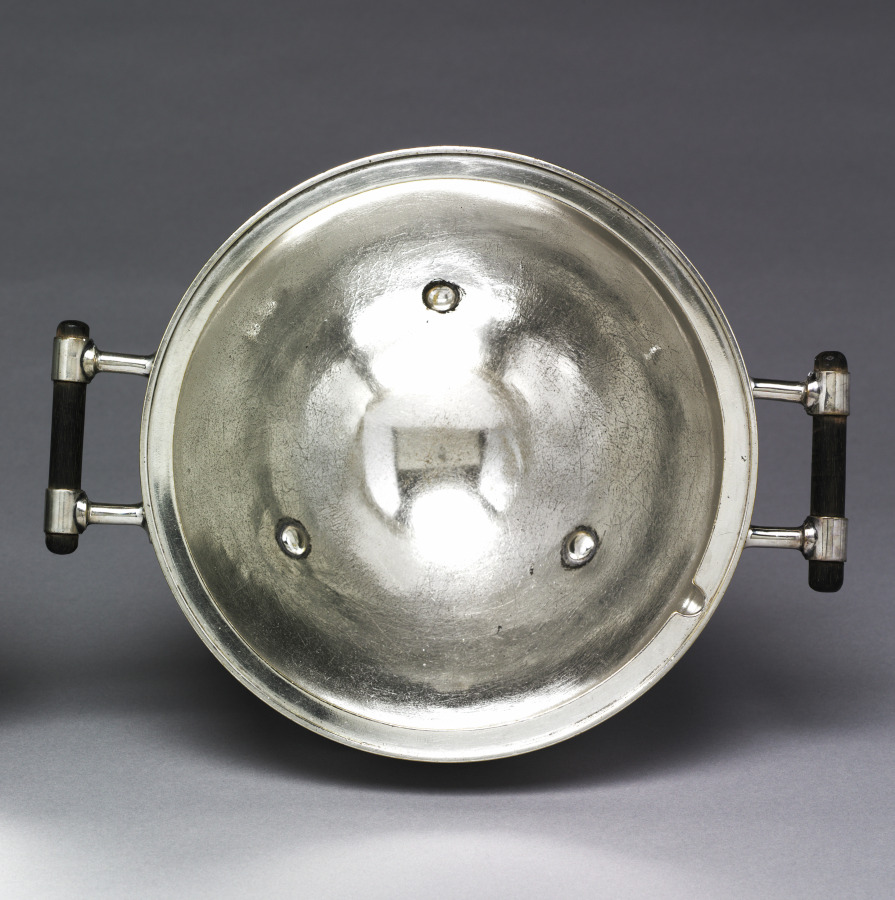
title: Tureen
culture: England, 19th century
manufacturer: Hukin & Heath (British)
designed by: Christopher Dresser (British, 1834–1904)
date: c. 1880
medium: silver plated metal, ebony handles and knop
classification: Metalwork